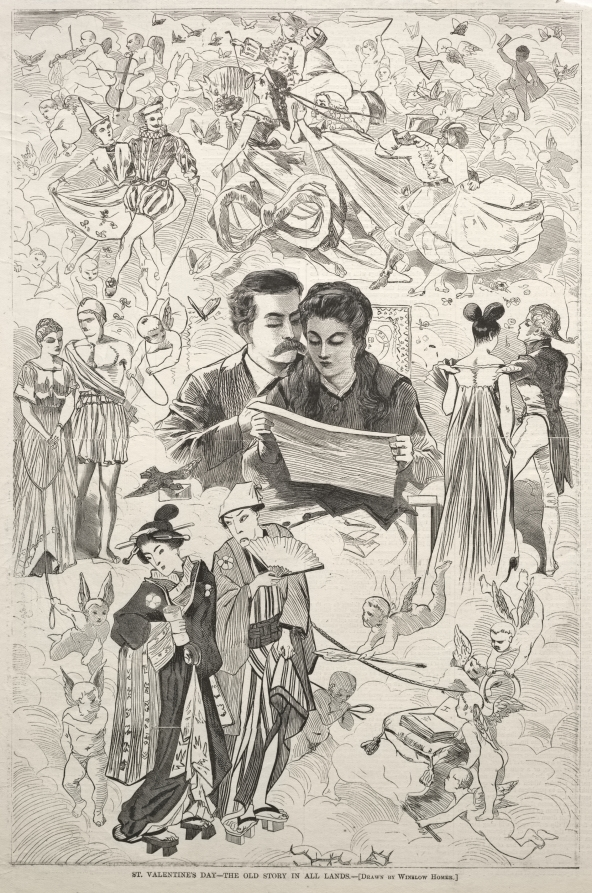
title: St. Valentine's - The Old Story in All Lands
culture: America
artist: Winslow Homer (American, 1836–1910)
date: 1868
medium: wood engraving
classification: Print